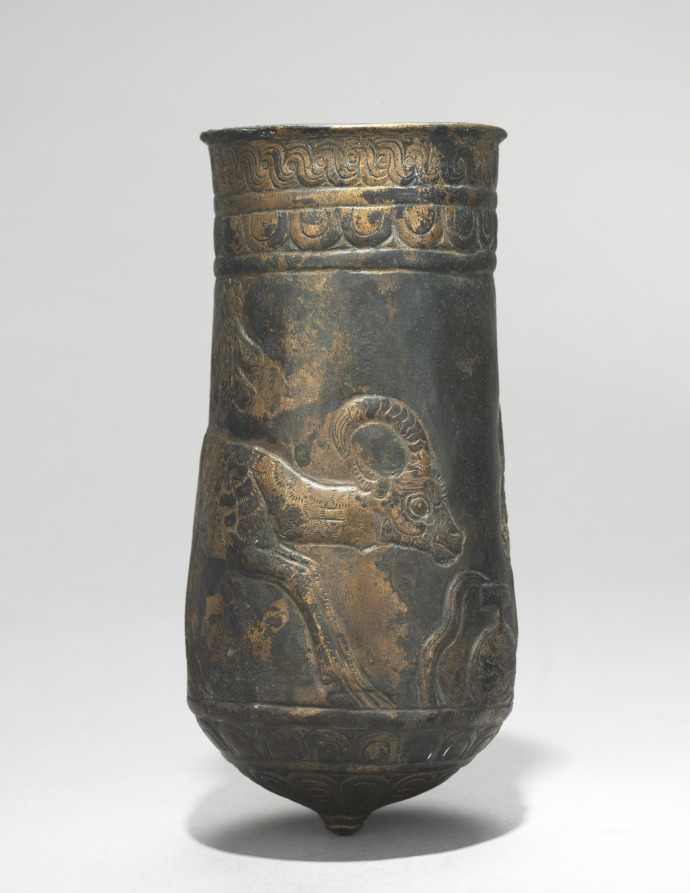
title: Button-Based Situla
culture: Iran, Luristan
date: 900–700 BCE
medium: bronze, repoussé, punched, incised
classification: Metalwork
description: The metalworkers of Luristan provided the Assyrian empire with elaborate bronze ornaments and vessels. These two situla are decorated symmetrically---one with ibexes drinking from an overflowing water jar; the other, with sphinxes.